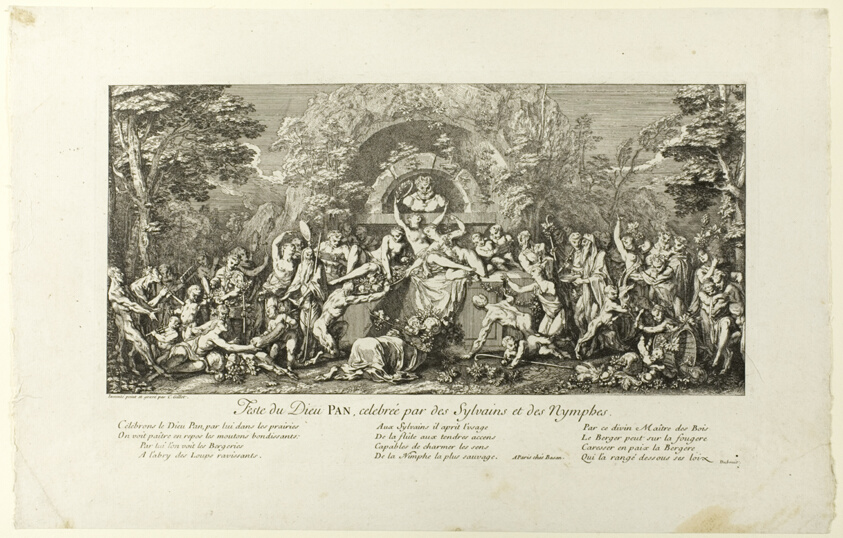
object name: Print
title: Festival of the God Pan, Celebrated by the Sylvans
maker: Claude Gillot (French, 1673-1722)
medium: Etching on paper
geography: France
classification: etching; print; prints and drawing